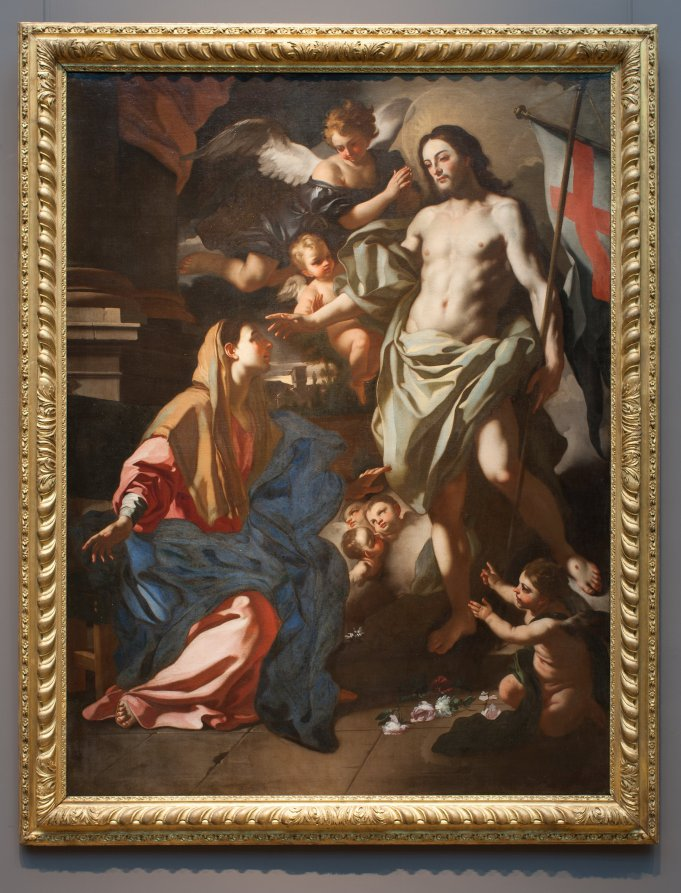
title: The Risen Christ Appearing to the Virgin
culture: Italy, 18th century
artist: Francesco Solimena (Italian, 1657–1747)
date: c. 1708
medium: oil on canvas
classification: Painting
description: The dramatic contrasts of light and dark reveal the long aftereffects of Caravaggio in Naples. Yet, the elegant forms, rich colors, and perfected body of Christ have far more affinities with the idealizing strand of Italian art in the 1600s and 1700s. Solimena sought to improve on nature, based on the study of antiquity, aiming to create a work of grandeur and nobility meant to inspire reverence and devotion appropriate to the holy subject.